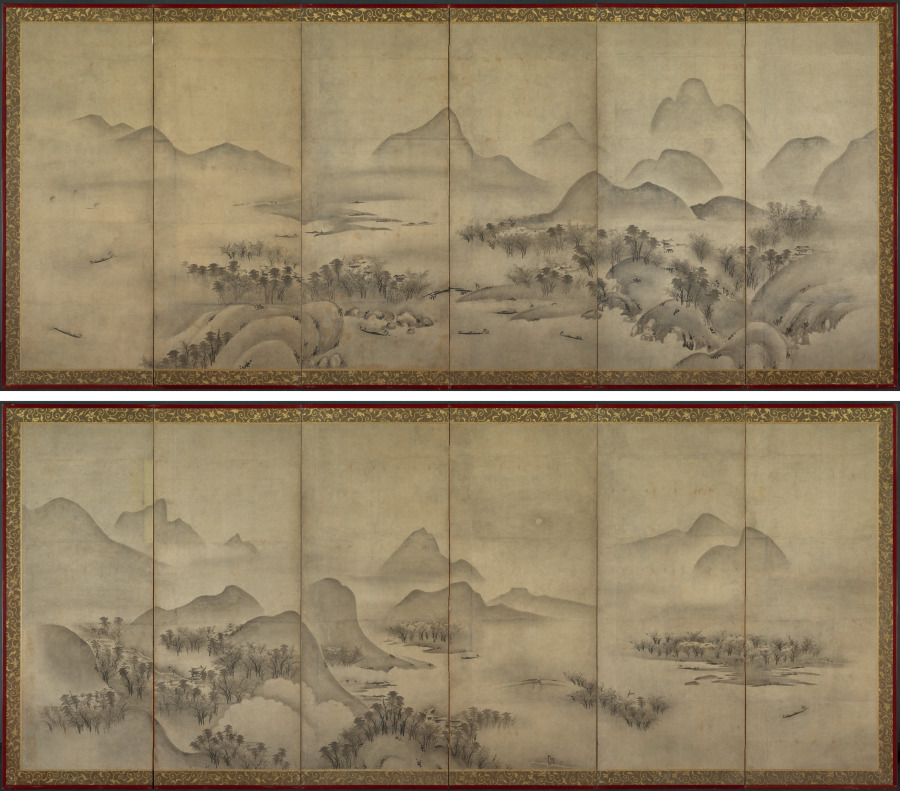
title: Moonlit Landscape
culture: Japan, Muromachi period (1392–1573)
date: late 1500s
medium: pair of six-panel folding screens, ink on paper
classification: Painting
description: This unsigned and unsealed composition includes imagery from the Eight Views of the Xiao and Xiang Rivers. Scanning the composition from right to left, four of the Eight Views subjects appear: sunset glow over a fishing village, returning sails off a distant shore, autumn moon over Lake Donting, and evening bell from a mist-shrouded temple. Not all the elements of the traditional Eight Views theme are here, but the artist suggests its literary presence by leading the viewer through a summer’s journey from one day to the next, aided, like the travelers in the landscape, by the light of the moon.